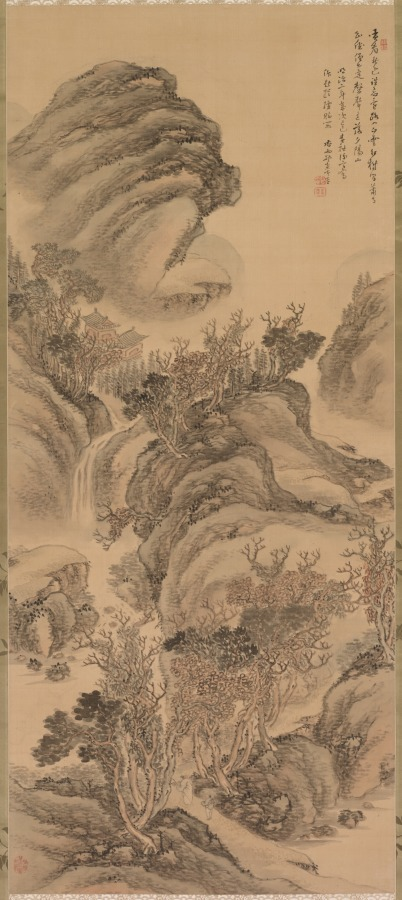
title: Sunset over Autumn Mountains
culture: Japan, Edo period (1615–1868)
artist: Hoashi Kyōu (Japanese, 1810–1884)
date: 1869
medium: hanging scroll; ink and light color on silk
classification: Painting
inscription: translation of poem [by Nora Liu]: The way was forgotten while enjoying the conversation and colors of Autumn, The road entered among the red trees and the white clouds, The trace of a path led to the lonely temple where the monks received enlightenment, The sound of chimes echo remotely in the mountains where the sunset falls. In the year 1869, Kyou